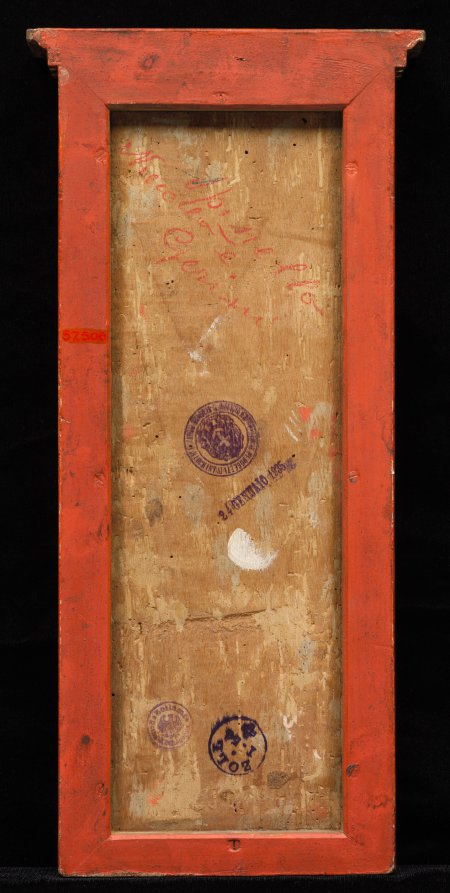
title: Standing Saint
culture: Italy, late 19th-early 20th century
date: late 19th - early 20th century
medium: tempera on panel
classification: Painting